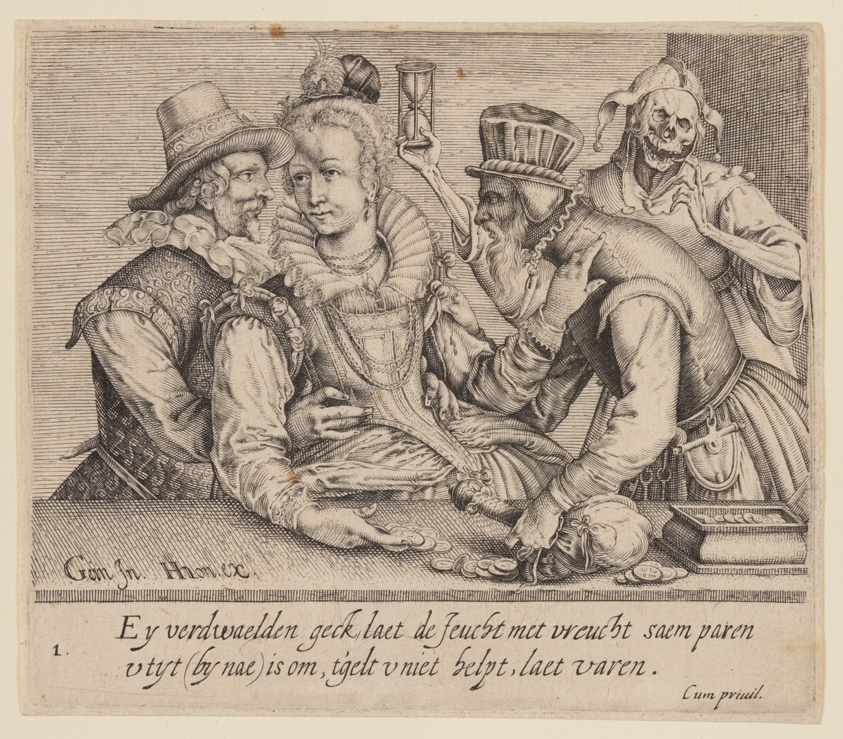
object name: Print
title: A Young Woman between a Young Man and an Old Man, from Unequal Lovers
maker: Attributed to Andries Stock (Netherlandish, 1572/82-after 1648); after Jacques de Gheyn II (Dutch, 1565–1629)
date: c. 1610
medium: Engraving on ivory laid paper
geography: Netherlands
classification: engraving; paper; print; prints and drawing